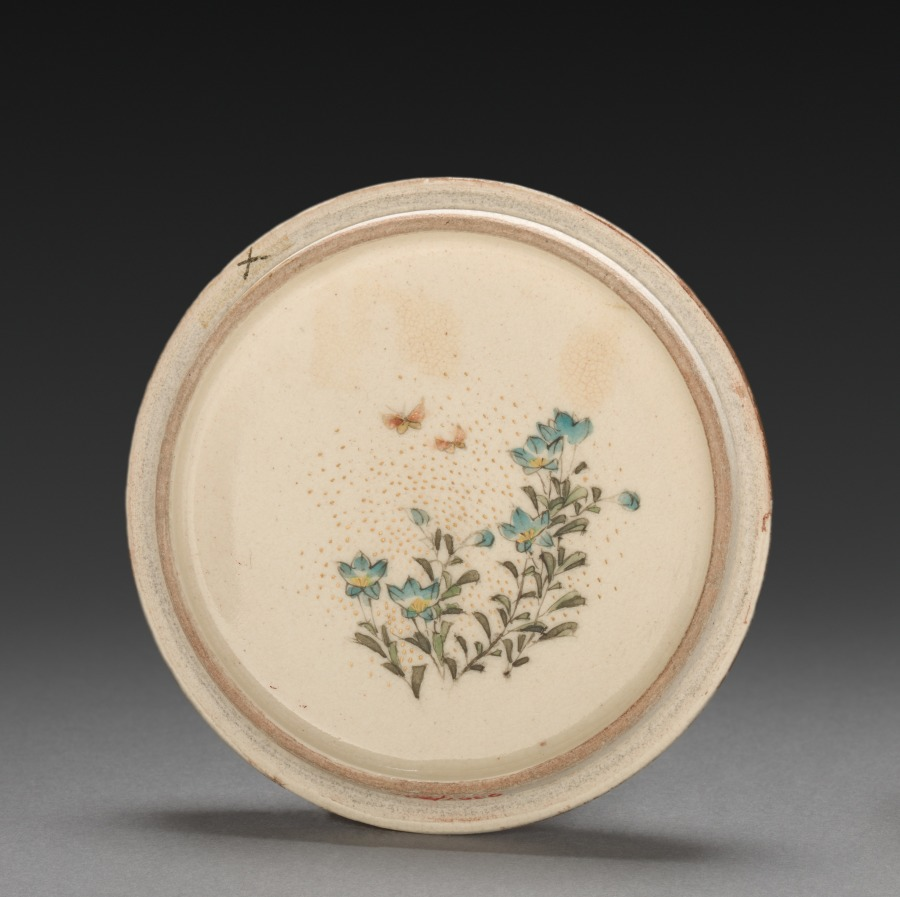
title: Covered Dish (lid)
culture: Japan, Meiji period (1868–1912)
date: early 1900s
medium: porcelain with overglaze color enamel and gold (Satsuma ware)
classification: Ceramic